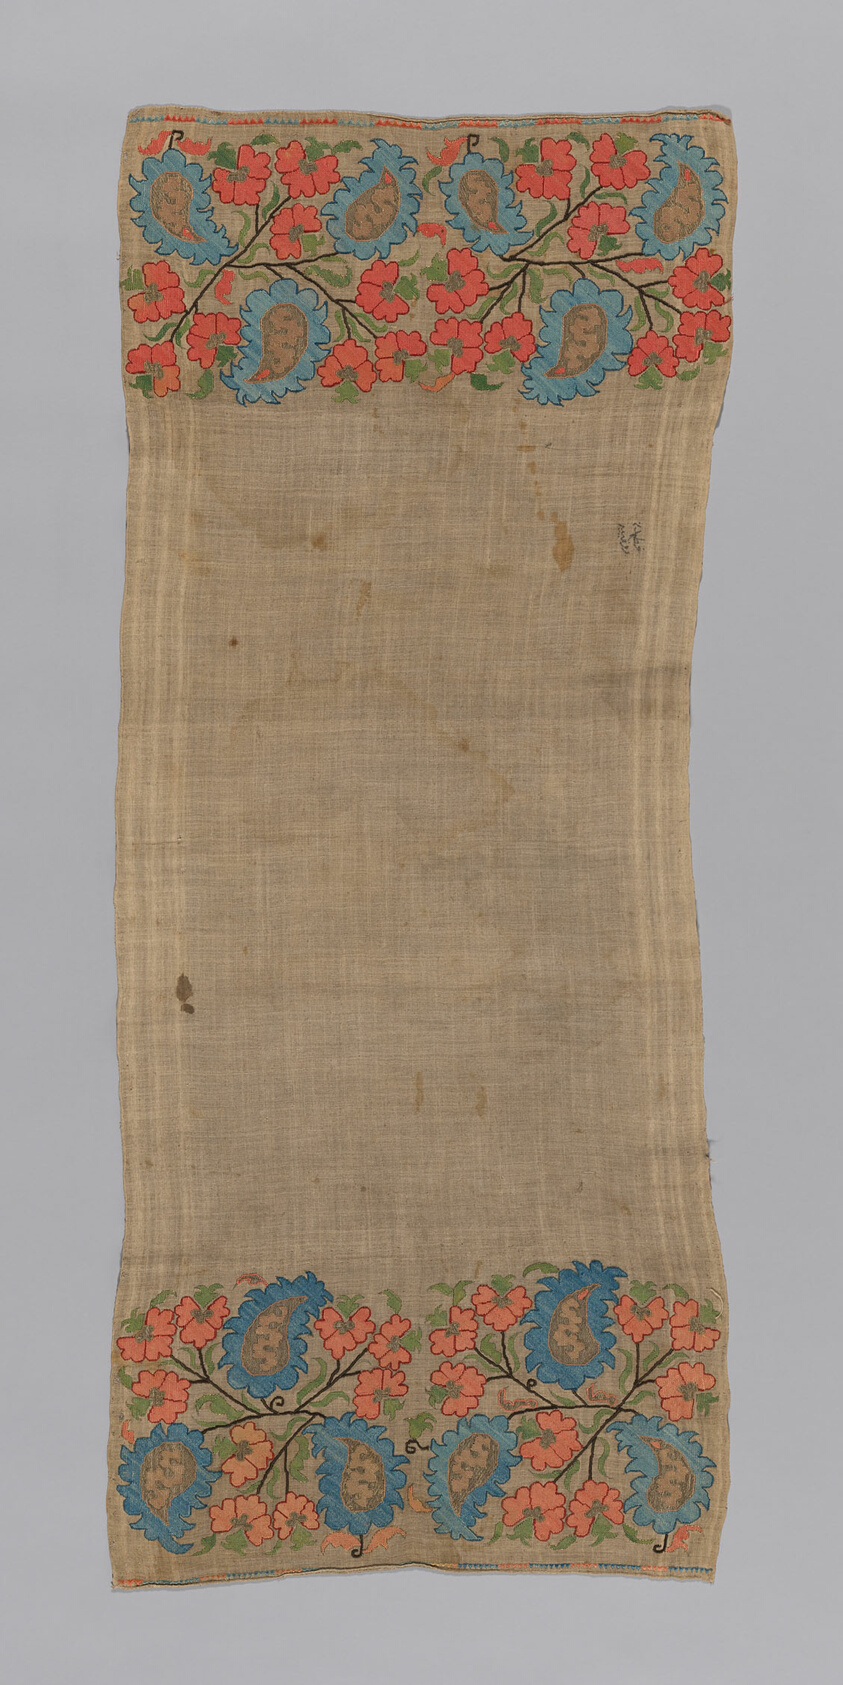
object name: Textile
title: Towel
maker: Turkey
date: 1700/1725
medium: Embroidered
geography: Turkey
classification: textile; needlework (visual works); weaving